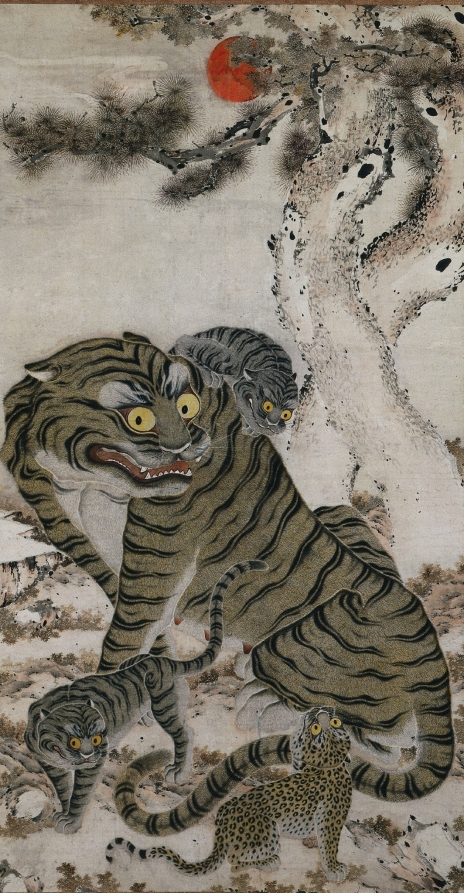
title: Tiger Family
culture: Korea, Joseon dynasty (1392–1910)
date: late 1800s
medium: hanging scroll; ink and color on paper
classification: Painting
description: In deep mountains, a tigress, two cubs, and a leopard welcome the early morning sun. This is not merely a playful scene but a well calculated image with symbols of longevity (pine trees), prosperity (tigress and cubs), and good fortune (leopard). Traditionally, on New Year’s Eve, the image of a fearsome-looking tiger was pasted on entrance doors to ward off evil spirits. Conventional Korean tiger paintings often include frolicking magpies, but here, the crimson sun is placed behind a majestic pine. Through the sunrise and the details of the felines’ skin shines the artist’s keen interest in creating a realistic atmosphere.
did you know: A great number of tigers used to have live in the Korean peninsula. An old Chinese proverb says: “Korean people hunt tigers half of the year, and tigers hunt people other half of the year.”